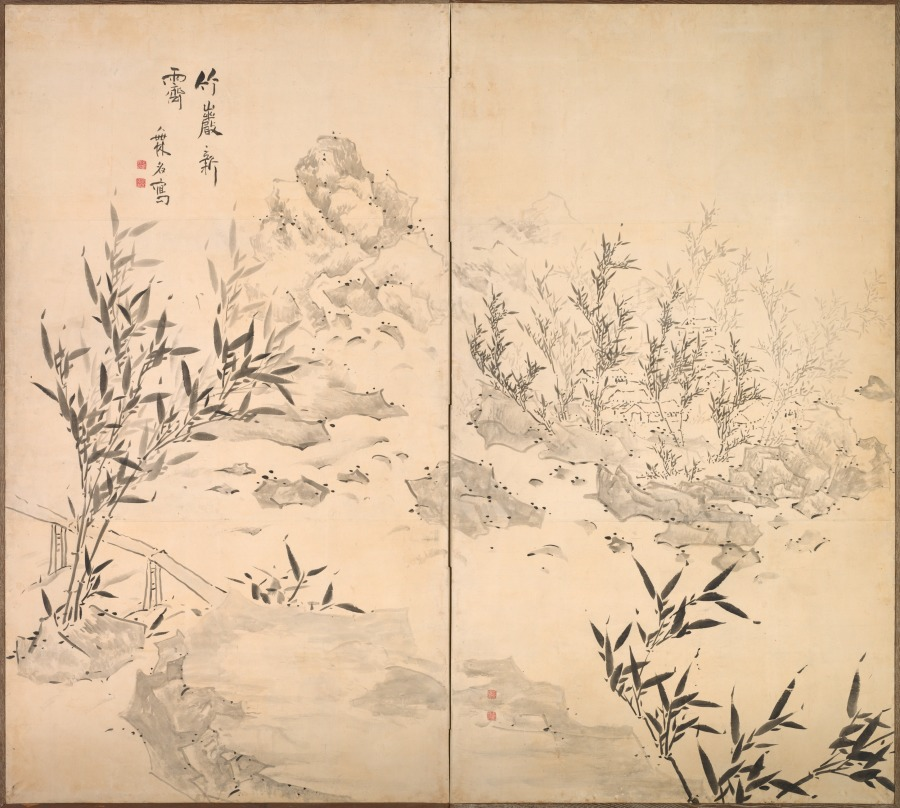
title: Bamboo and Rocks in Clearing Skies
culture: Japan, Edo period (1615–1868)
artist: Ike Taiga (Japanese, 1723–1776)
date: mid-1700s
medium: Two-panel folding screen; ink on paper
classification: Painting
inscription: signed, titled, and sealed by the artist on the top of the left panel. Set of two seals appears once on each panel: after the signature on the left panel and lower left on the right panel. The first of the two square seals reads "ike no mumei," the second reads "sangaku doja."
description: The title written on this screen corresponds to one on a design in Taiga’s Brush Methods (大雅堂画法). The concept conveyed is one of scenery and spirit refreshed by precipitation. In the screen, a rain-filled stream rushes from the mountains into a river. A village is nestled amid giant bamboo in the distance. A platform-like flat rock in the foreground invites us to step into the scene.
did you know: Ike Taiga ranks among the most creative painters of the Edo period: he produced over 1,000 compositions in various formats.